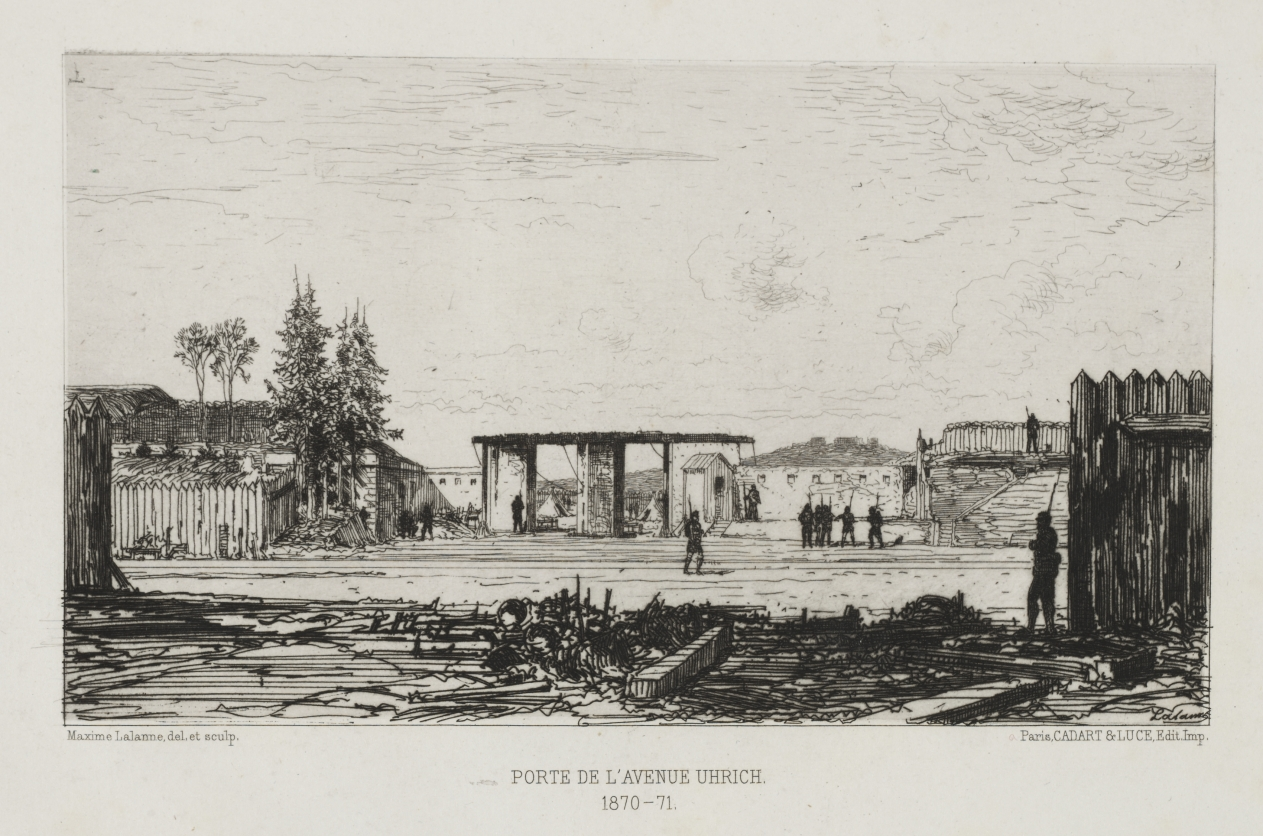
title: Porte du l'Avenue Uhrich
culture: France, 19th century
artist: Maxime Lalanne (French, 1827–1886)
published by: Cadart and Luce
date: 1870–71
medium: etching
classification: Print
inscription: artist's signature inscribed in plate: Lalanne (l.r.); printed below image in margin Maxime Lalanne, del. et sculp. (l.l.); PORTE DE L'AVENUE UHRICH/ 1870-71 (l.c.); Paris, CADART & LUCE, Edit, Imp (l.r.)